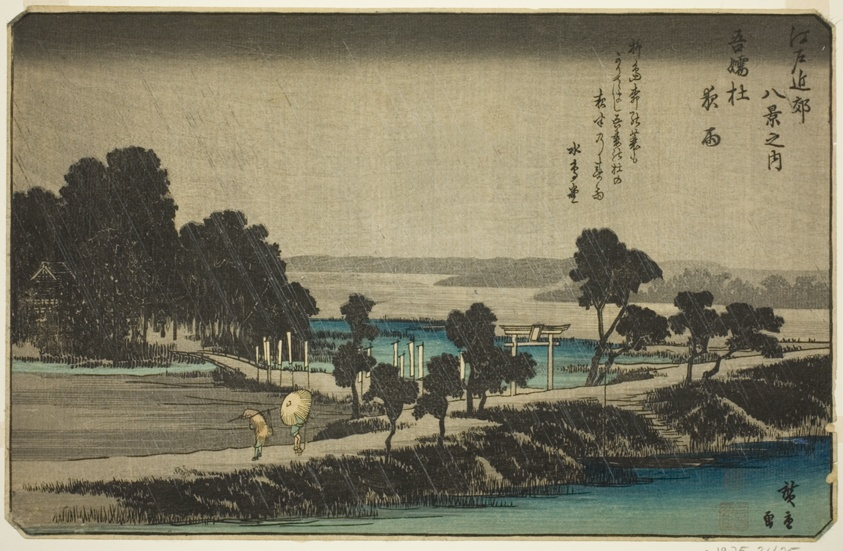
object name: Print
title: Evening Rain at Azuma Shrine (Azuma no mori yau), from the series "Eight Views in the Environs of Edo (Edo Kinko hakkei no uchi)"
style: Japanese (culture or style)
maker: Utagawa Hiroshige 歌川 広重; Japanese, 1797-1858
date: c. 1837/38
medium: Color woodblock print; oban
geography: Japan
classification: woodblock print; print; asian art